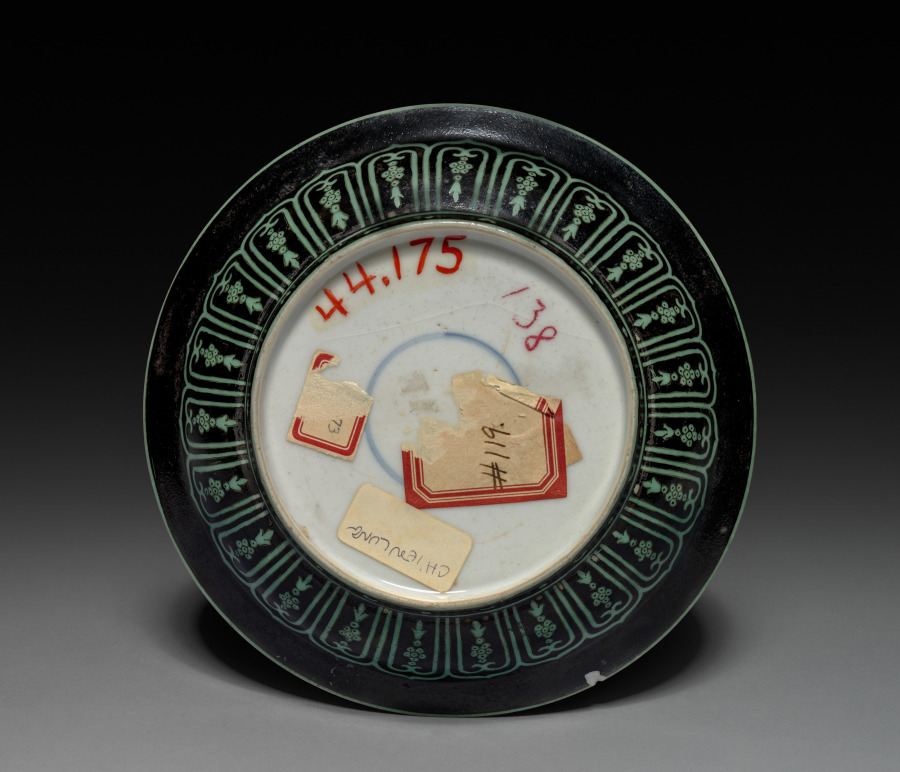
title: Dish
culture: China, Qing dynasty (1644–1911), Qianlong reign (1736–95)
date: 1736–95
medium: porcelain with famille rose overglaze enamel decoration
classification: Ceramic